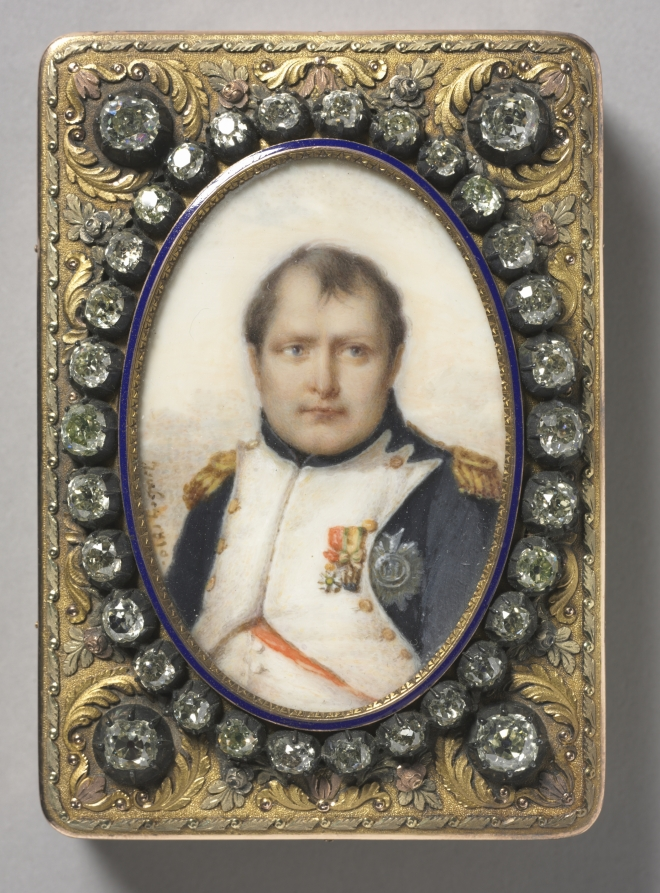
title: Portrait of Napoleon I, Emperor of the French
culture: Box: Switzerland; miniature: France, 19th century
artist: Jean-Baptiste Isabey (French, 1767–1855)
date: 1810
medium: watercolor on ivory in a Swiss gold box with diamonds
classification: Miscellaneous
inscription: inscribed inside cover: "Précieux souvenir de reconnaissance donné par l'Empr. Napoléon 1er à L'Abbé Bonavita, son Aumônier."